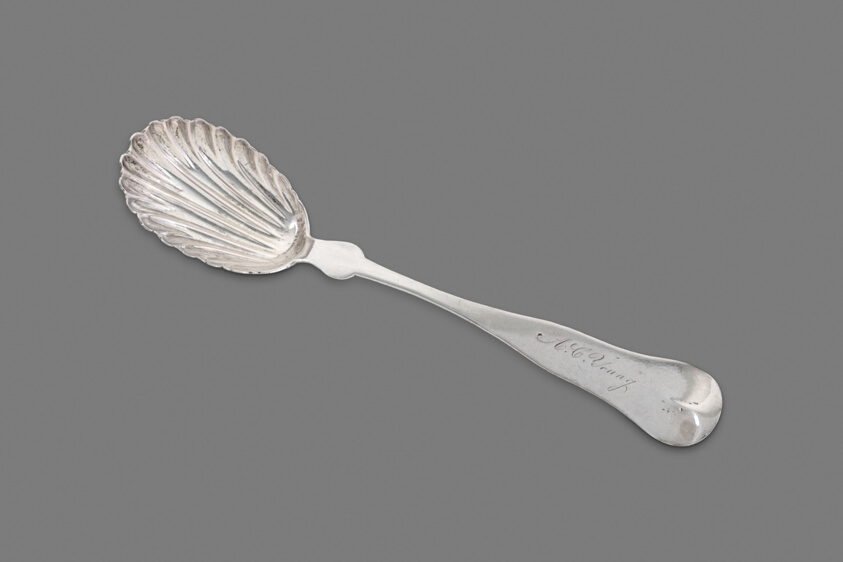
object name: Metalwork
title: Sugar Spoon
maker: Don Carlos Ayer (American, 1813–1868); Boston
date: 1850–60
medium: Silver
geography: Boston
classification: spoon; silver; utensil; american decorative arts; american arts; decorative arts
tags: spoon